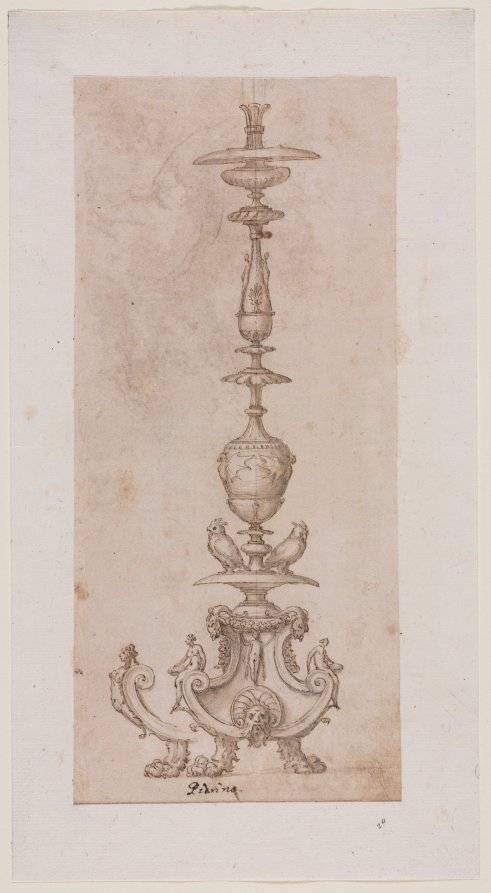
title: Design for a Candlestick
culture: Italy, 16th century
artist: Luzio Romano (Italian, active 1528–75)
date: mid 1500s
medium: pen and brown ink and brush and brown wash, over black chalk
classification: Drawing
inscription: lower center, in brown ink: Pierino ; RECTO OF SECONDARY SUPPORT, lower right, in graphite: 20 ; lower right, in graphite(?): [erased, sideways] ; VERSO OF SECONDARY SUPPORT, lower right, in graphite: A 3107